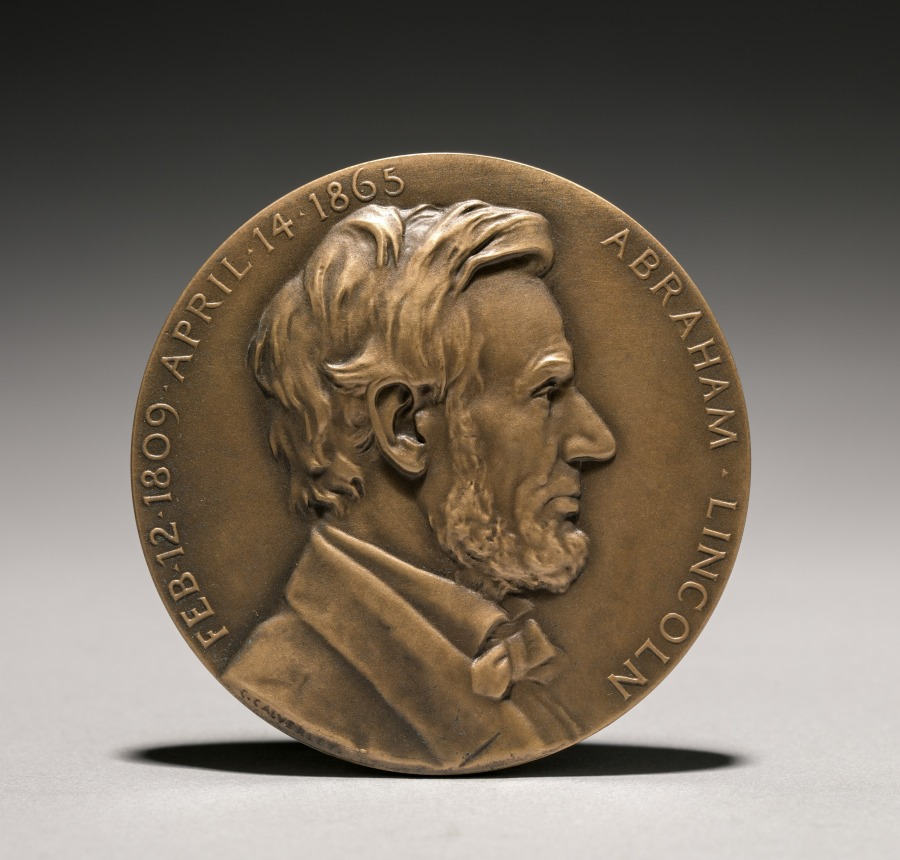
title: Abraham Lincoln Medal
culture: America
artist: Charles Calverley (American, 1833–1914)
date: 1900s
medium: bronze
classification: Metalwork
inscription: obverse - right-hand side: "FEB.12.1809 APRIL.14.1865"; left-hand side: "ABRAHAM LINCOLN." Below: "C. Calverley." reverse - "WITH MALICE TOWARD NONE/ WITH CHARITY FOR ALL/ WITH FIRMNESS IN THE RIGHT/ AS GOD GIVES US TO SEE THE RIGHT/ LET US STRIVE ON TO FINISH/ THE WORK WE ARE IN/ ALincoln [in ligature]."